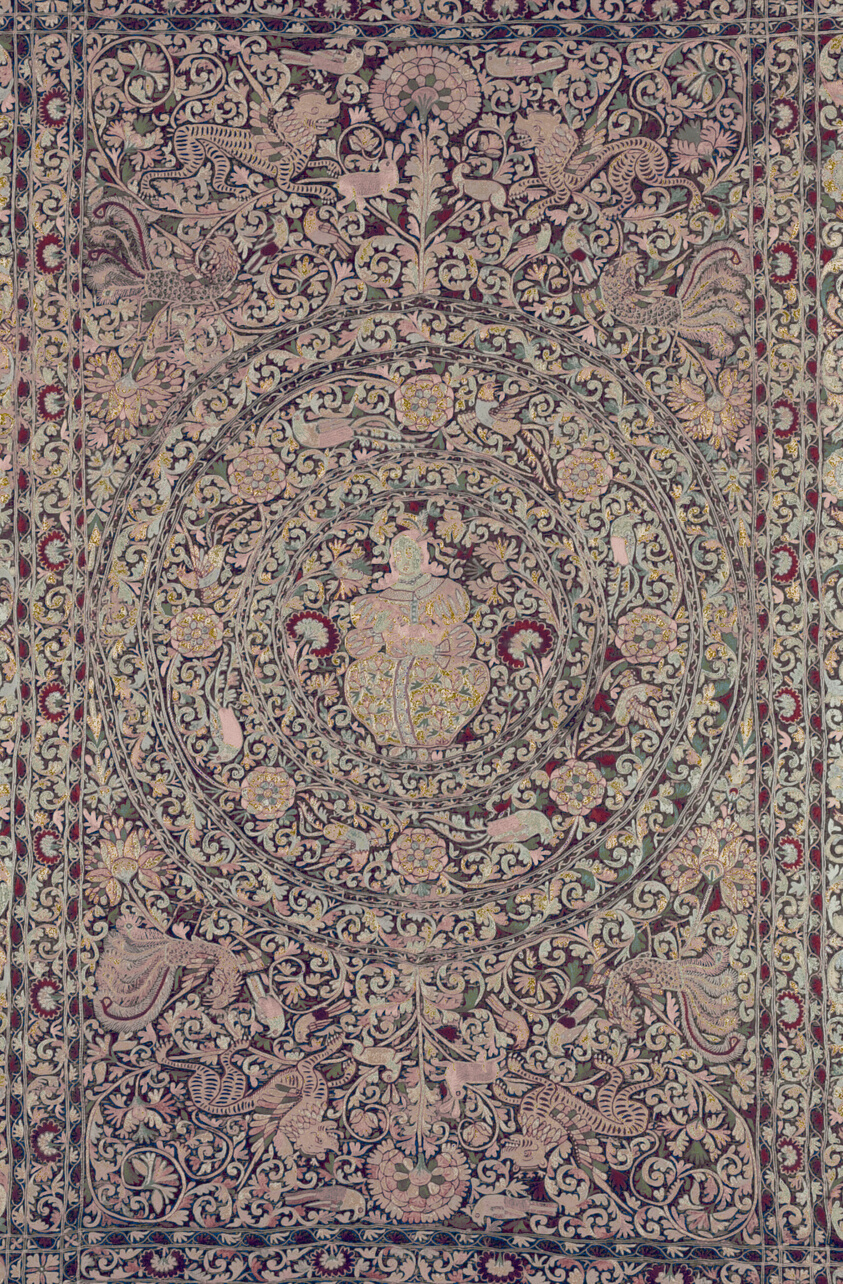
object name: Textile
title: Bedcover Depicting the Five Senses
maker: Portugal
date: 1675/1725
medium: Silk, satin weave; embroidered with silk floss in chain stitches; backed and lined with silk, plain weave; edged with silk, warp-faced plain weave with extended ground weft fringe; silk tassels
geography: Portugal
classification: textile; needlework (visual works)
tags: women, circles